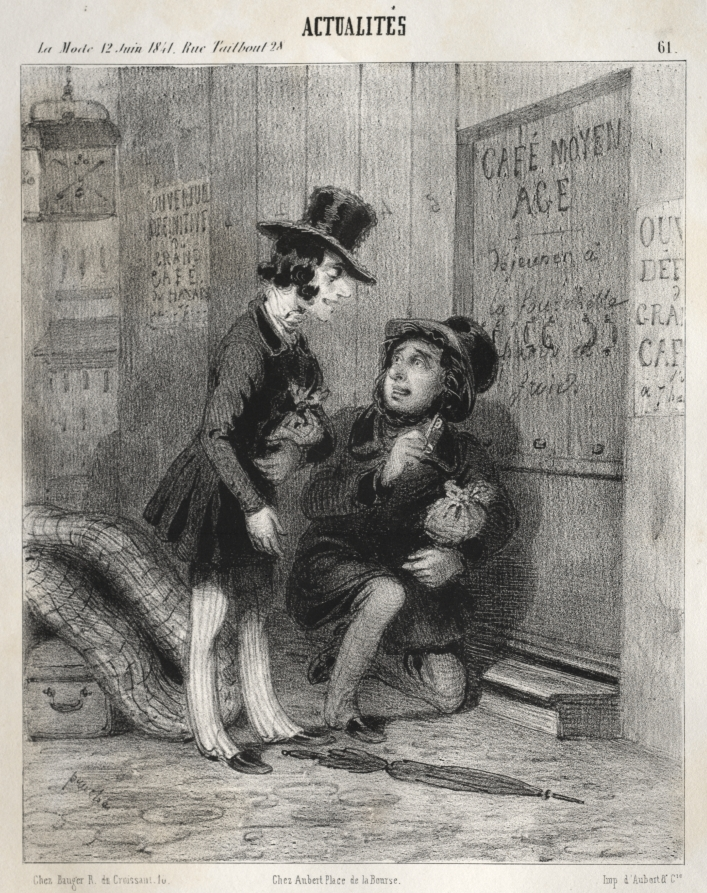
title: Actualités: Hé mon vieux! c'est comme cela qu'on fait les affaires aujourdhui! on affice...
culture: France, 19th century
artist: Clémente Pruche (French, 1831–1870)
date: 1841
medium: lithograph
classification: Print